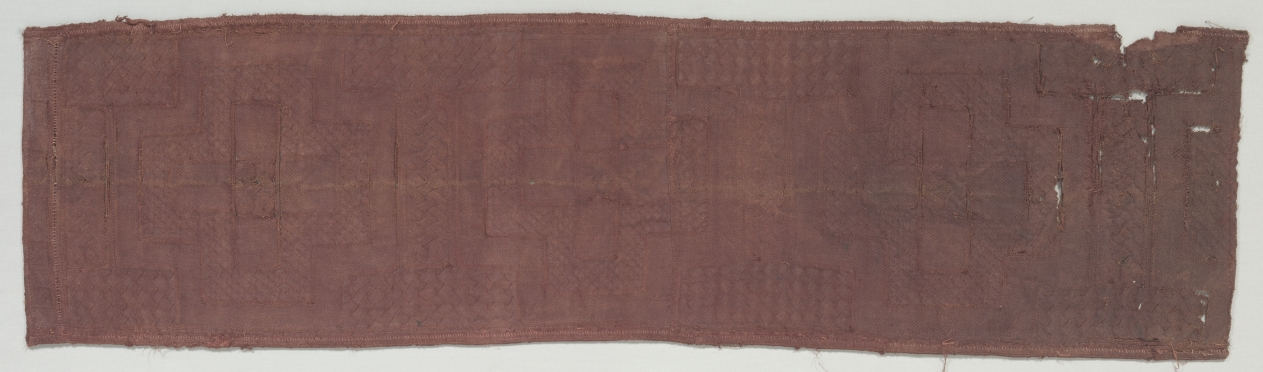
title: Fragment of Woman's overskirt (ncaka)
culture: Africa, Democratic Republic of the Congo, Kuba makers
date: late 1800s–early 1900s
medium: Raffia and tukula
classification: Garment